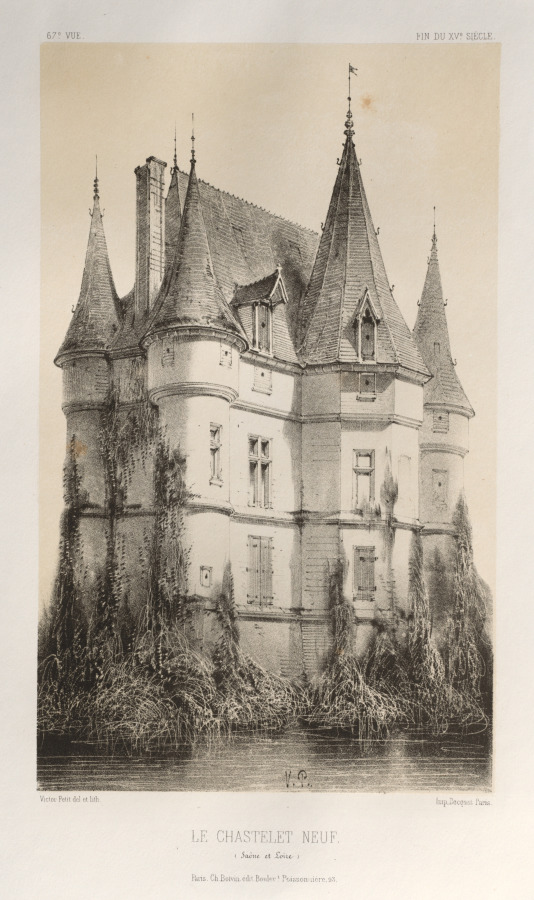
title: Architecture Pittoresque ou Monuments des XVeme. Et XVIeme. Siecles: Chateaux de France des XV et XVI Siecles: Pl. 67, Le Chastenet-Neuf Saône et Loire)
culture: France, 19th century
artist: Victor Petit (French, 1817–1874)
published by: Charles Boivin (publisher and editor); Lith de Godard a Paris (printer)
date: 1860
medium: lithograph with tint stone, from portfolio of 100 lithographs with tint stone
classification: Print